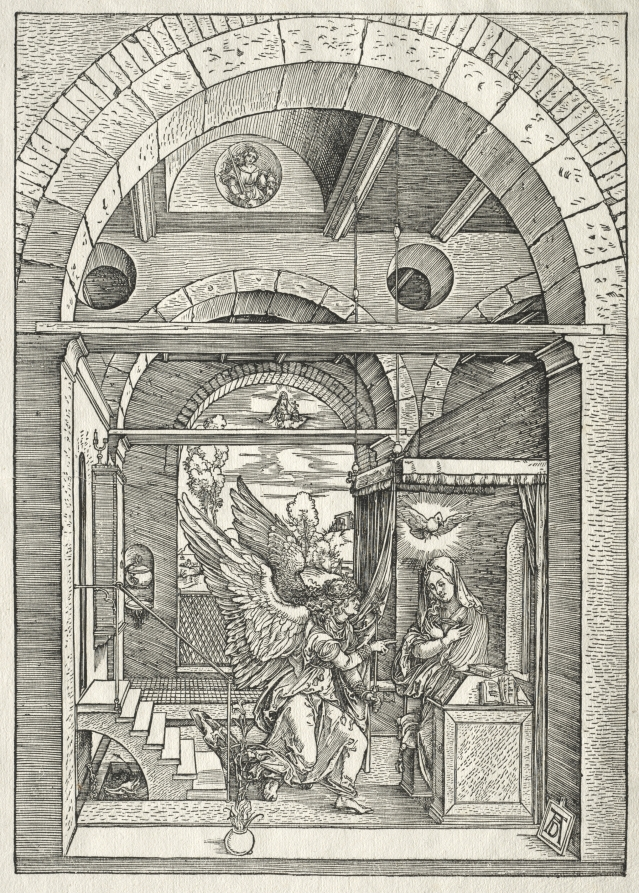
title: Life of the Virgin: The Annunciation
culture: Germany, early 16th Century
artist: Albrecht Dürer (German, 1471–1528)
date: 1504–1505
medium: woodcut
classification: Print